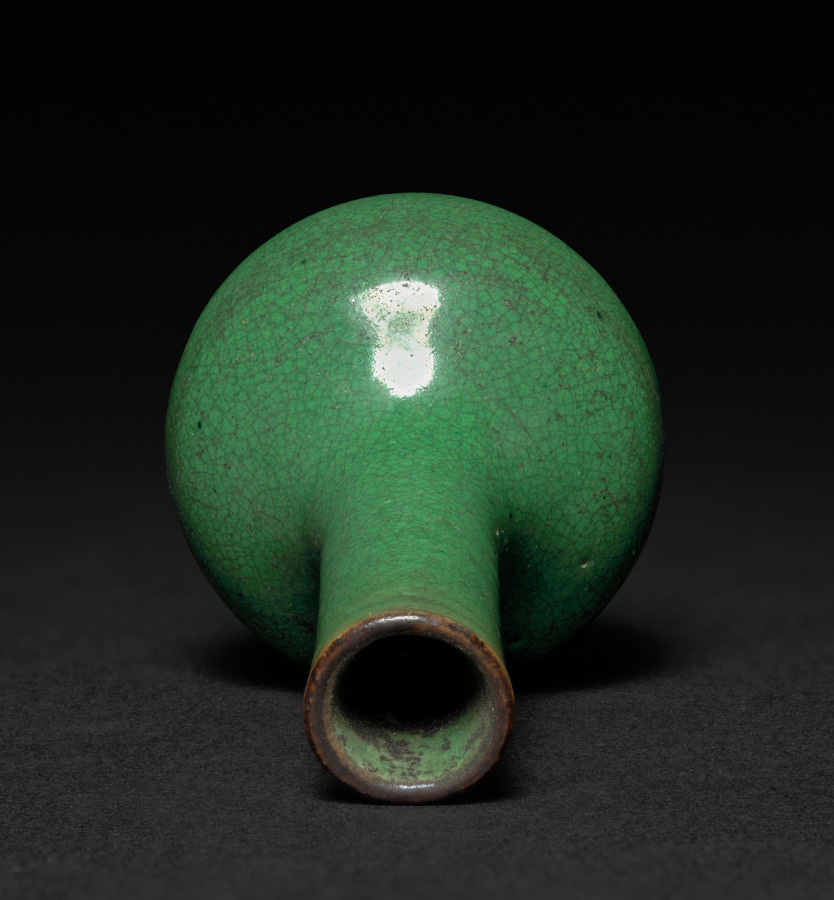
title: Vase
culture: China, Qing dynasty (1644-1911)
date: 1644–1911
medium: porcelain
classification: Ceramic